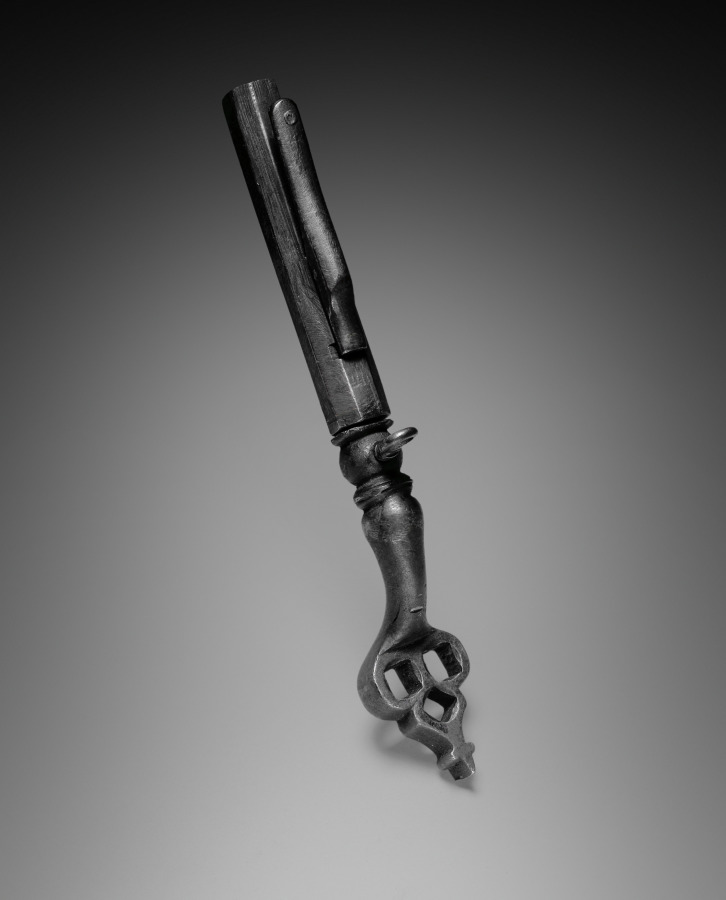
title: Combined Wheel-Lock Spanner and Powder Measure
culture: Germany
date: c. 1625–1650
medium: steel, trefoil top pierced with square holes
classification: Arms and Armor